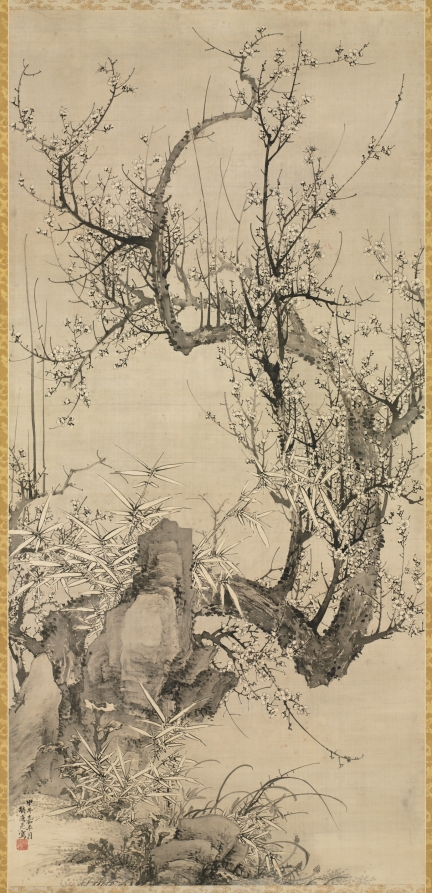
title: Plums, Bamboo, and Orchid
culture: Japan, Edo period (1615–1868)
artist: Yamamoto Baiitsu (Japanese, 1783–1856)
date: 1834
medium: hanging scroll; ink on silk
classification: Painting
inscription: date and signature at lower left.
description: This painting represents three of the plants known as the Four Gentlemen of Chinese painting; it lacks only autumn’s chrysanthemum. The plants’ characteristics are symbols of Confucian virtues, such as open-mindedness (bamboo), strength in the face of adversity (plum), and humility (orchid).